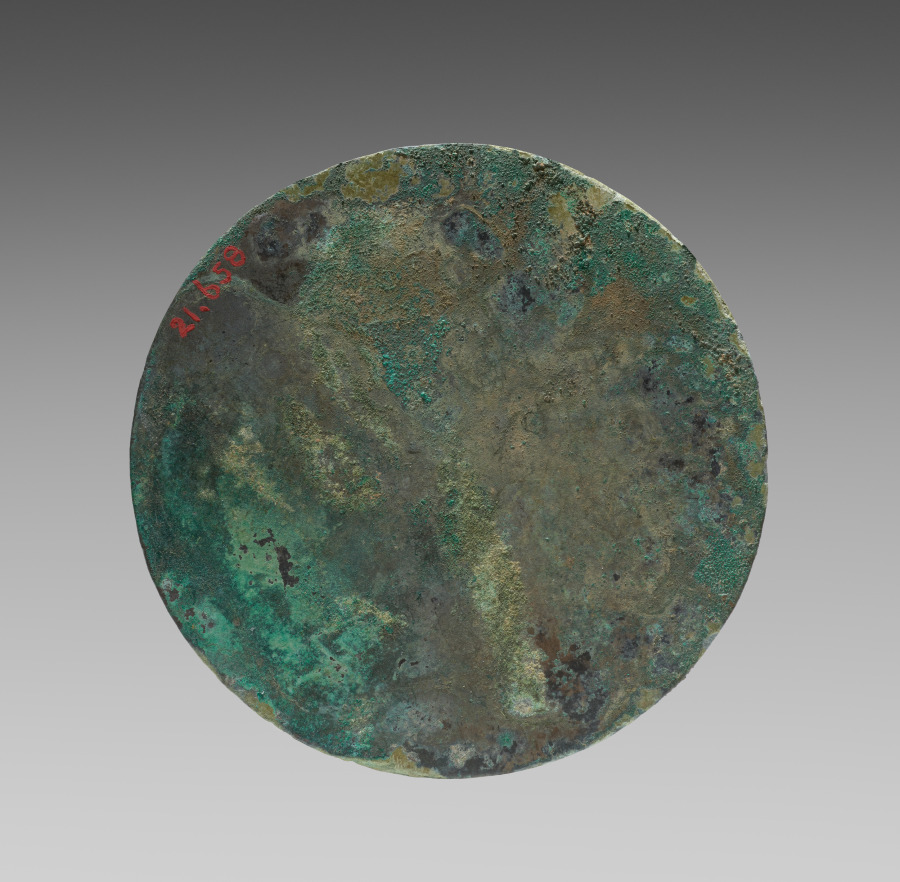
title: Mirror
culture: Korea, Goryeo dynasty (918–1392)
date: 918–1392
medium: bronze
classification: Metalwork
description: From ancient times, a mirror assumed various roles; a ritualistic tool, a diplomatic gift, and a luxury commodity. During the Goryeo dynasty (918-1392), which saw the great advancement of metallurgy, the royal court was the center of distributing sophisticated bronze artifacts. According to historical records, on the 7th day of the Lunar New Year, the king bestowed a bronze mirror inscribed with auspicious symbols upon each court official as part of a ceremony to celebrate the Day of Humans. This explains why a large quantity of bronze mirrors were excavated from elite tombs.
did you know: Due to its origin as an important tool in religion and politics, mirrors are often mentioned in many Korean proverbs that warn certain behaviors.